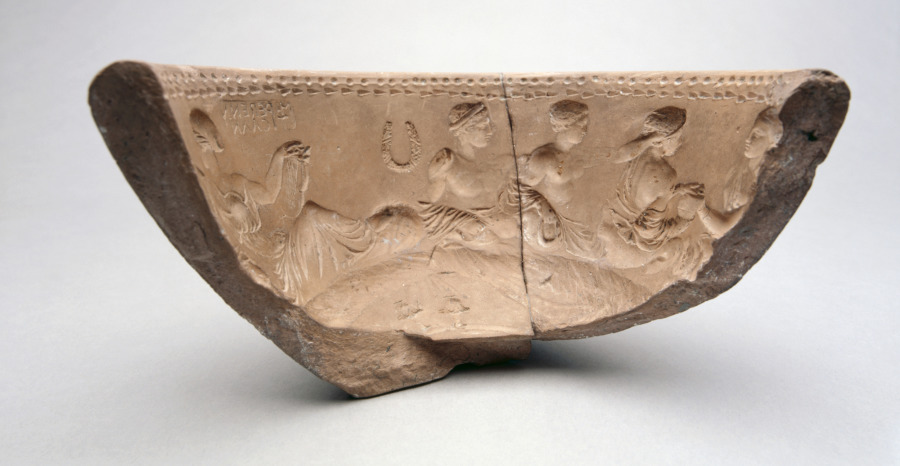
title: Fragment of a Mold for Arretine Bowl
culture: Italy, Roman, Augustan period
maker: M. Perennius (Roman, c. 100 BCE–100 CE)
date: 27 BCE–14 CE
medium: terracotta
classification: Ceramic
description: Preserving nearly half of a mold for a relief-decorated terracotta bowl, these joining fragments show women and youths reclining at a symposium. On one side, a woman passes a bowl or cup to a youth, whom another youth reaches over to crown with a garland or wreath. A third youth reclines beside them, and a second woman sits on the next couch, looking away and holding a lyre on her raised knee. Above, within a stamped rectangle, appears the signature M. PERENN | TIGAANI.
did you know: This mold includes an artist signature, reversed to appear properly in the final product.